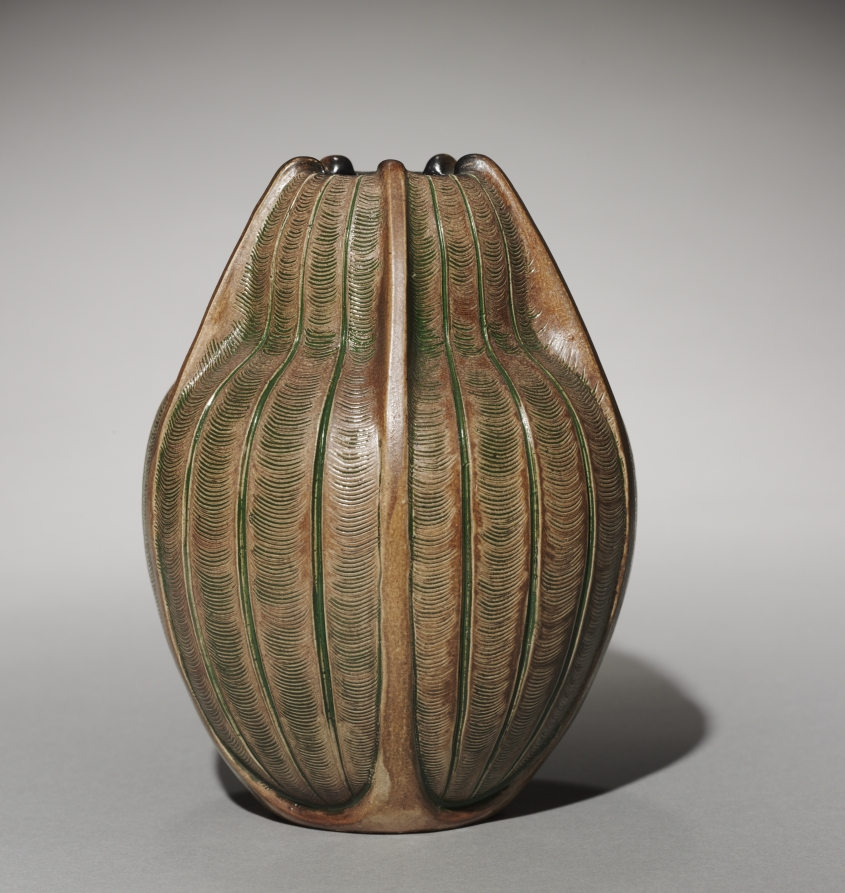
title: Vase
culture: England, early 20th Century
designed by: Edwin Martin (British, 1860–1915)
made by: Martin Brothers (British)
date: 1905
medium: stoneware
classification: Ceramic